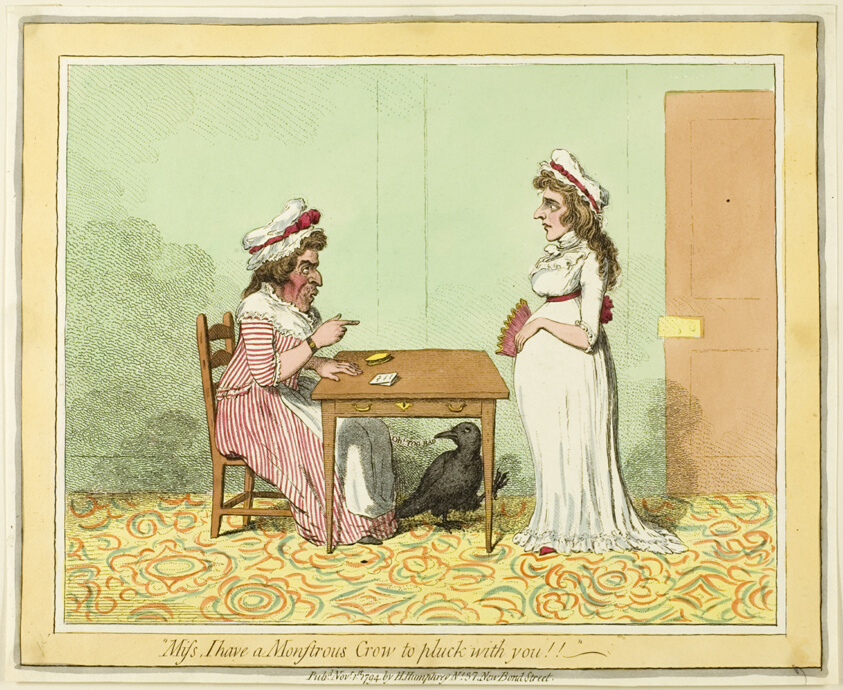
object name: Print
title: "Miss, I have a Monstrous Crow to pluck with you!!"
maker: James Gillray (English, 1756-1815); published by Hannah Humphrey (English, c. 1745-1818)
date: published November 1, 1794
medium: Etching in dark brown, with handcoloring, on cream wove paper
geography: England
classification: etching; print; prints and drawing